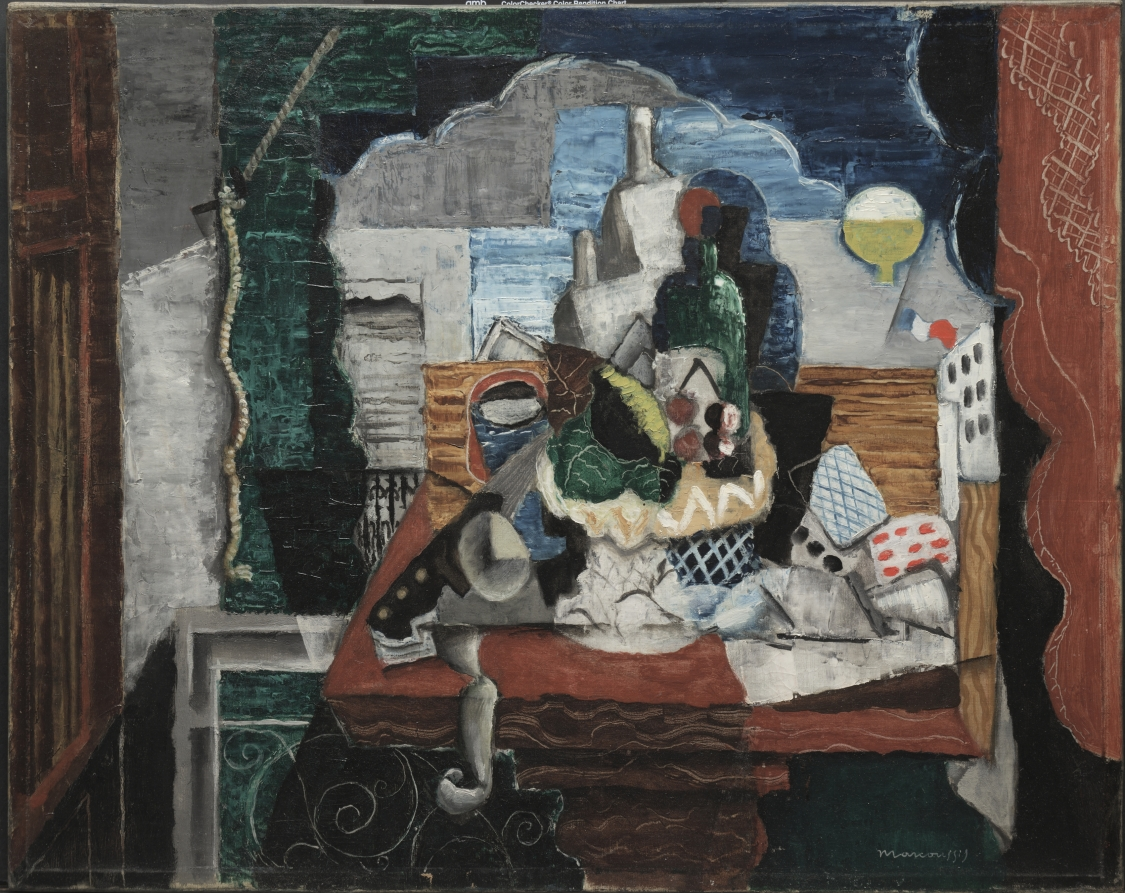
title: Night Café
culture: France, 20th century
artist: Louis Marcoussis (French, 1883–1941)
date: c. 1923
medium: oil on canvas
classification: Painting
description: Following Cubist principles, this painting depicts a table from multiple perspectives, providing different views of various objects simultaneously. Louis Casimir Ladislas Markus was born in Warsaw, Poland, into a Jewish family that had converted to Catholicism. In 1903, he moved to Paris where he met poet Guillaume Apollinaire and artists Georges Braque and Pablo Picasso. He then began experimenting with Cubism. Also of Polish descent, Apollinaire had changed his own name and urged the artist to change his name to Marcoussis after a French village. The yellow hot air balloon and the French flag glimpsed out of the window pay homage to the artist’s adopted homeland.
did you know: The French poet Guillaume Apollinaire urged the artist to change his name to Marcoussis, after a French village south of Paris. The artist was born Louis Casimir Ladislas Markus in Warsaw, Poland, and moved to Paris in 1903.